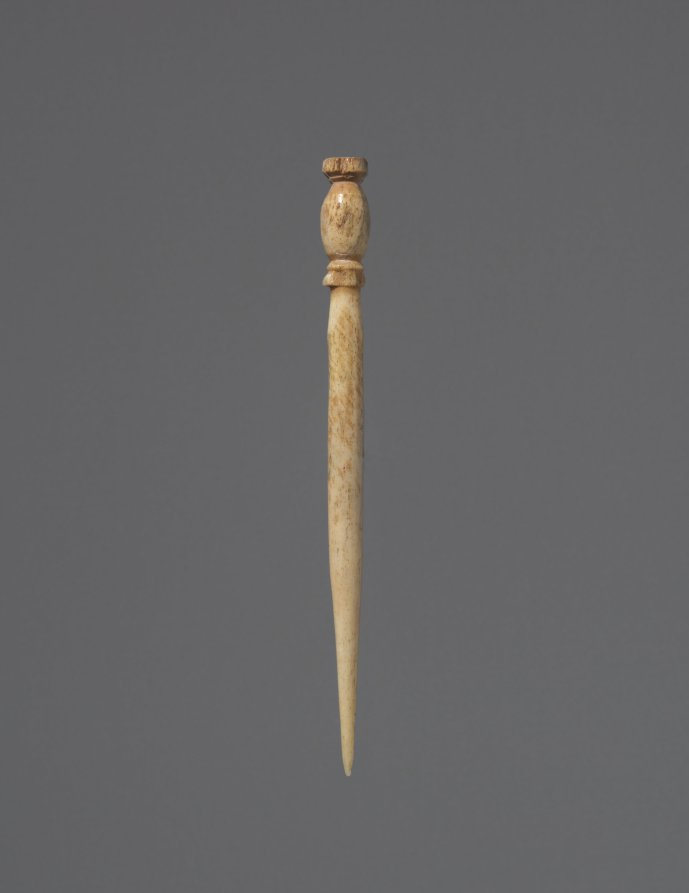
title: Hairpin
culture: Greece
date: 400s BCE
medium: ivory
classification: Ivory